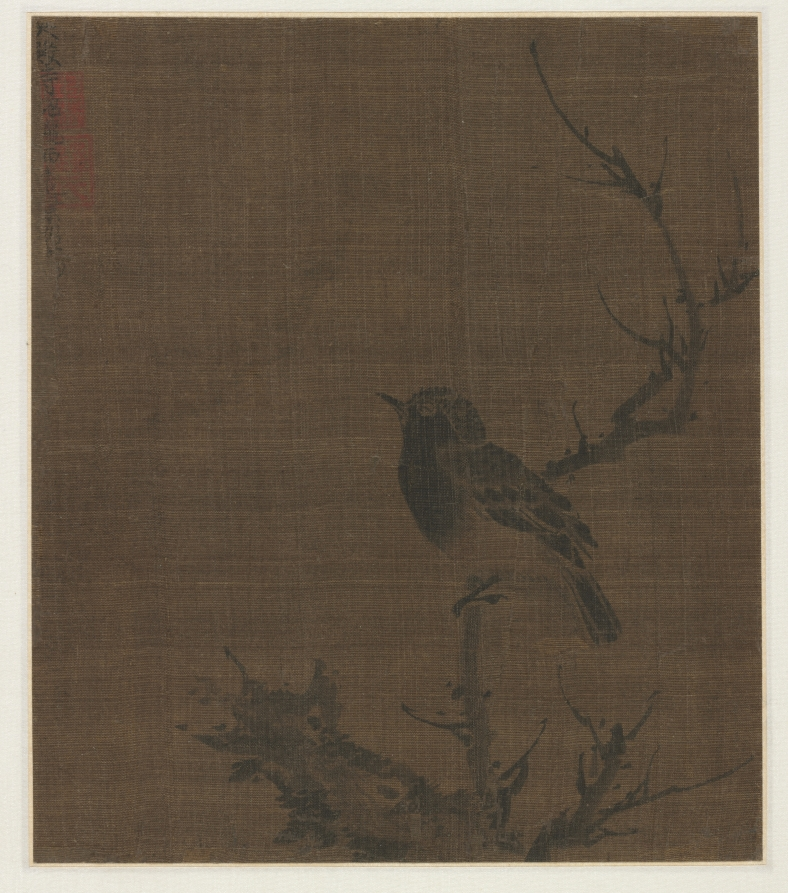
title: Sleeping Bird on a Prunus Branch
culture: China, Ming dynasty (1368–1644)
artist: Bian Wenjin (Chinese, about 1354–1428)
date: 1400s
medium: album leaf; ink on silk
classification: Painting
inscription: Artist's inscription, signature, and 2 seals: Painted by Pien Ching-chao of Lung-hsi, painter-in-attendance of [Wu]-ying-tien. [seals] I-ch'ing-tung-chih; Pien shih Wen-chin